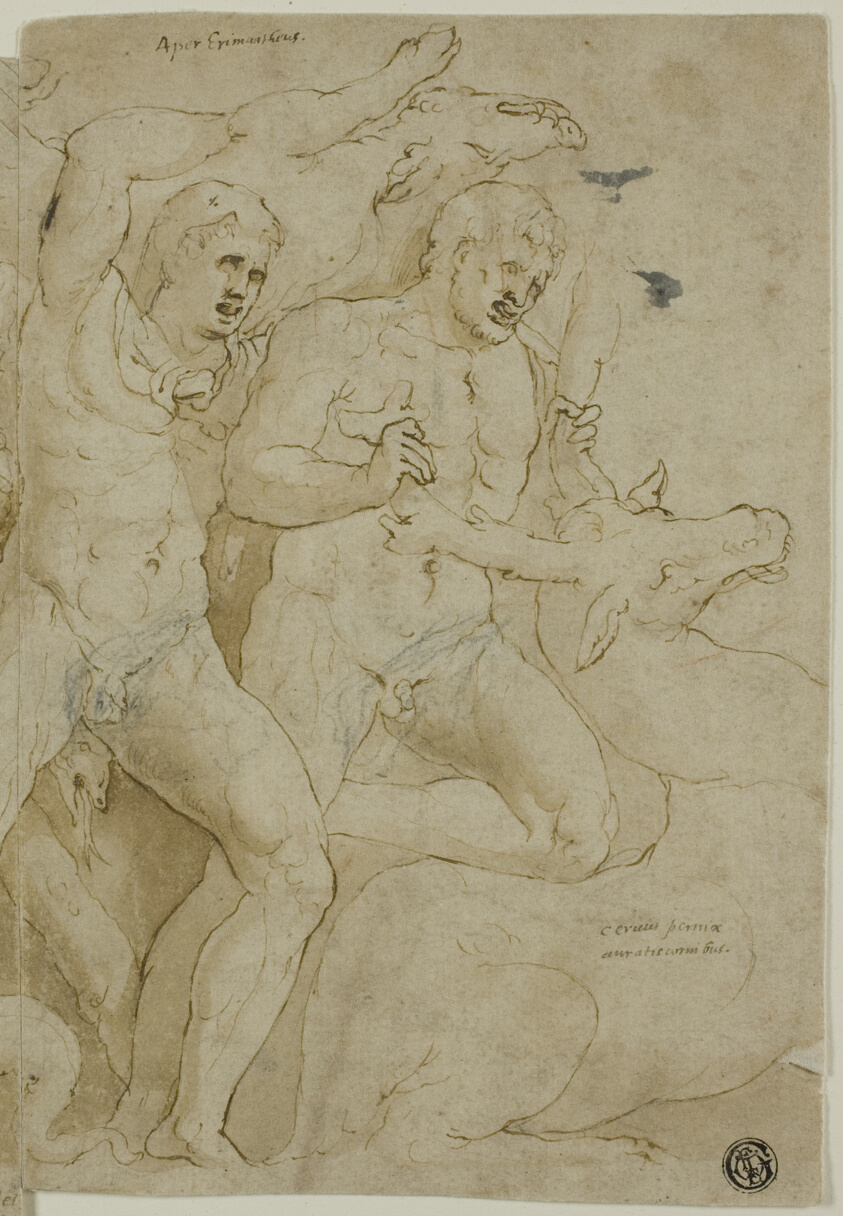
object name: Drawing and Watercolor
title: Ancient Sarcophagus Relief with the Labors of Hercules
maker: Attributed to Girolamo Sellari, called Girolamo da Carpi; Italian, 1501-1556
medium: Pen and brown ink with brush and brown wash, and traces of black chalk, on buff laid paper, pieced at center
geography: Italy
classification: ink with wash; drawings (visual works); prints and drawing